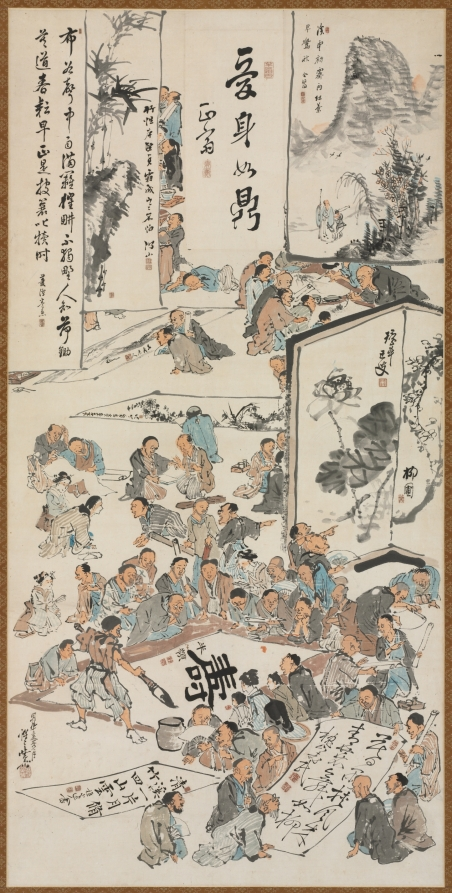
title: Painting Party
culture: Japan, Meiji period (1868–1912)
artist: Kawanabe Kyōsai (Japanese, 1831–1889)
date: 1880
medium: hanging scroll; ink and color on paper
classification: Painting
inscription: Artist's signature and seal at lower left.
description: In this collaborative painting, artists create works in response to patrons’ requests. Kawanabe Kyōsai painted the figures and outlines of the screens and scrolls, and 10 bunjin completed them. Each calligraphy and painting has a signature. Physician and calligrapher Nakane Hanrei (中根半嶺) (1831–1914) wrote “longevity” (壽) with an enormous ink-filled brush. Painter Fukushima Ryūho (福島柳圃) (1820–1889) did the plum on the folding screen, while Matsuoka Kansui (松岡環翠) (1818–1887) did the lotus; the two seem to be standing nearby, pointing others toward their accomplishment.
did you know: One participant in this gathering appears to be taking a nap.